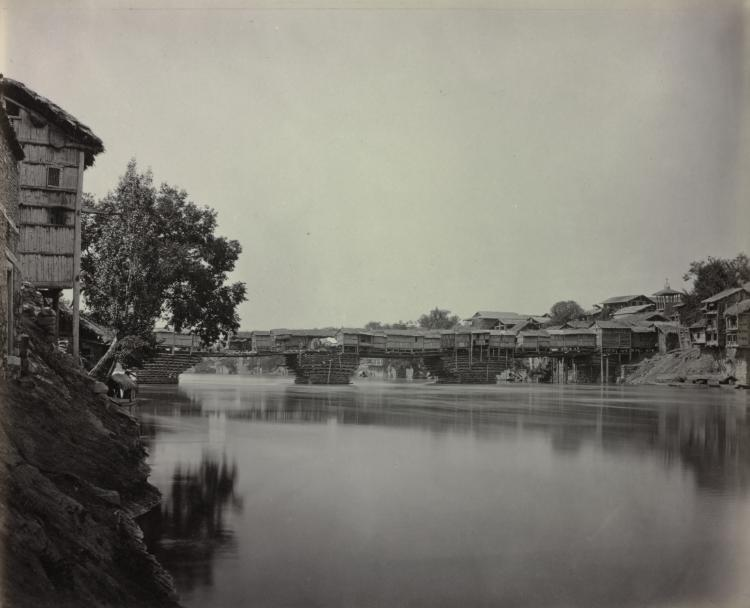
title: Bridge of Shops, Srinagar, Kashmir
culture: England, 19th century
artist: Samuel Bourne (British, 1834–1912)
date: 1864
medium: albumen print from wet collodion negative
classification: Photograph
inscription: Written in pencil on verso: "788"; "$900"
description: Taking up photography in his teens, Samuel Bourne soon achieved recognition for both his superb technical skills and keen aesthetic talents. When he sailed to India in late 1862, he left a banking career to pursue his passion for photography . He hoped to use his camera throughout the country and to write about his experiences for the British Journal of Photography. This charming photograph of a bridge filled with small huts demonstrates his creative ability to organize the random environment. His lively use of light and shade clearly defines the elements of architecture and landscape. The photographer allowed a favorite, early interest in water to dominate this picturesque image of Jaipur, which was founded in 1727 by Maharajah Jai Singh II. By the beginning of the 21st century, this small town had developed into a commercial city with a population of well over two million.